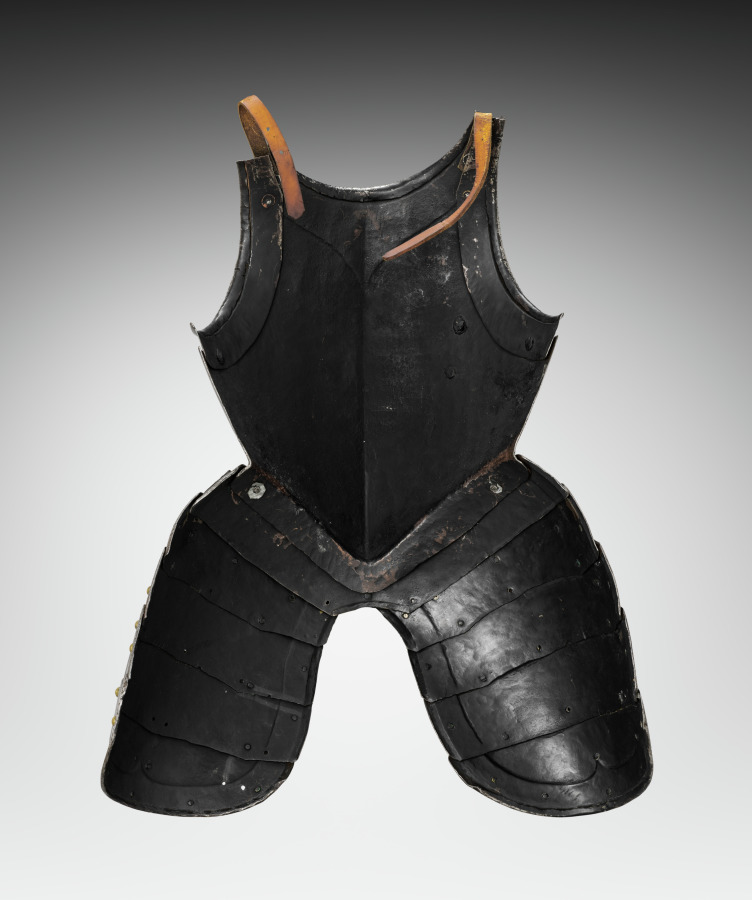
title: Breastplate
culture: South Germany, 16th century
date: c. 1560–1580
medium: steel, leather straps, brass rivets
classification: Arms and Armor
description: This armor was developed for the joust-a sporting combat between two mounted contestants. Although all of the elements of this armor date from the same period, they are not all from the same suit. This armor is thus called "composed." It also shows the asymmetry of jousting armor. The participants rode along a wall-like barrier known as a "tilt" with their left sides facing one another. Consequently, armor on that side of the body had to be thicker. Note the large plate (grandguard) over the left shoulder for extra protection. Also, the breathing holes in the helmet were placed on the right side (farthest from an opponent's lance) to avoid injuries from splinters. The bracket attached to the right breastplate is called the lance-rest, a shock-absorbing support designed to accommodate the lance when "couched" under the right armpit.